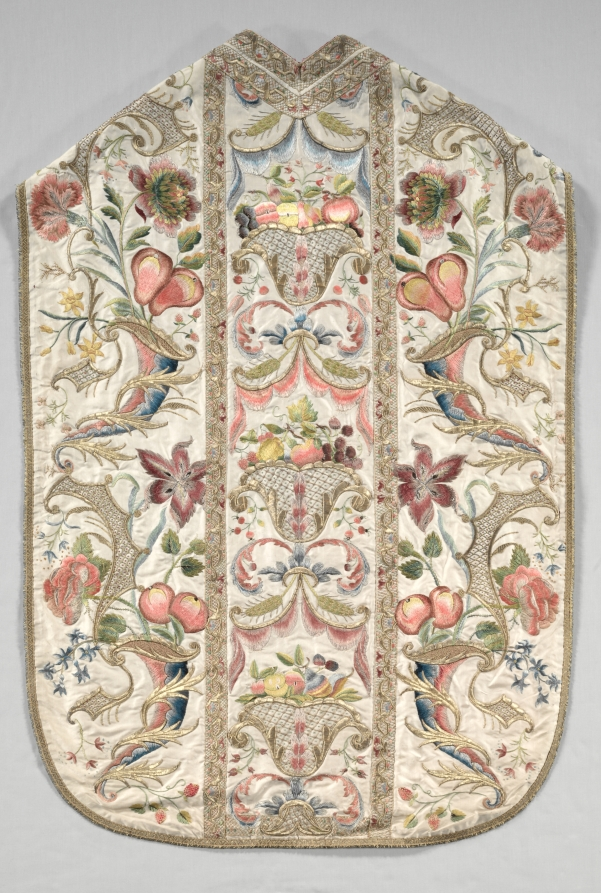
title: Chasuble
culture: Italy or Spain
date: 1700s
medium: Silk and metallic threads: embroidery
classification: Embroidery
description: The chasuble’s exquisite symmetrical decoration highlights its central panel where three illusionary gold containers hold skillfully shaded fruit in pastel silk tones. Delicately curving motifs enhance the side panels along with finely stitched strawberries in so-called French knots. This liturgical chasuble and other vestments, worn over a white alb with lace, were embroidered by professional specialists, such as experts who shaded colored silks or secured gold thread, in early versions of assembly lines that were usually in secular workrooms or in convents. The church or commissioner supplied the raw materials and paid a fee for the work.